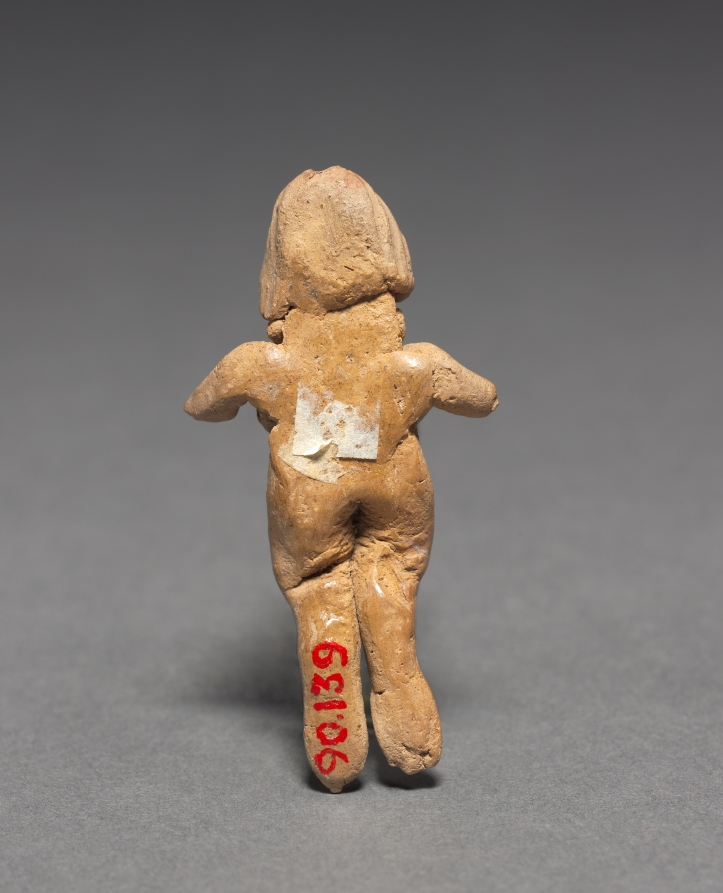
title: Female Figurine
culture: Mesoamerica, Mexico, Guanajuato, Chupícuaro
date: c. 400–100 BCE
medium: earthenware with pigment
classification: Sculpture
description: Small, solid, hand-modeled figurines were a staple of the early Mesoamerican artistic repertoire. Made in distinctive styles corresponding to geographic regions, they likely were used in a variety of contexts, including rites to assure health, fertility, and prosperity. This example is from the Chupícuaro region, north of modern-day Mexico City.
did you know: This figurine is small enough to fit comfortably in the palm of a hand.